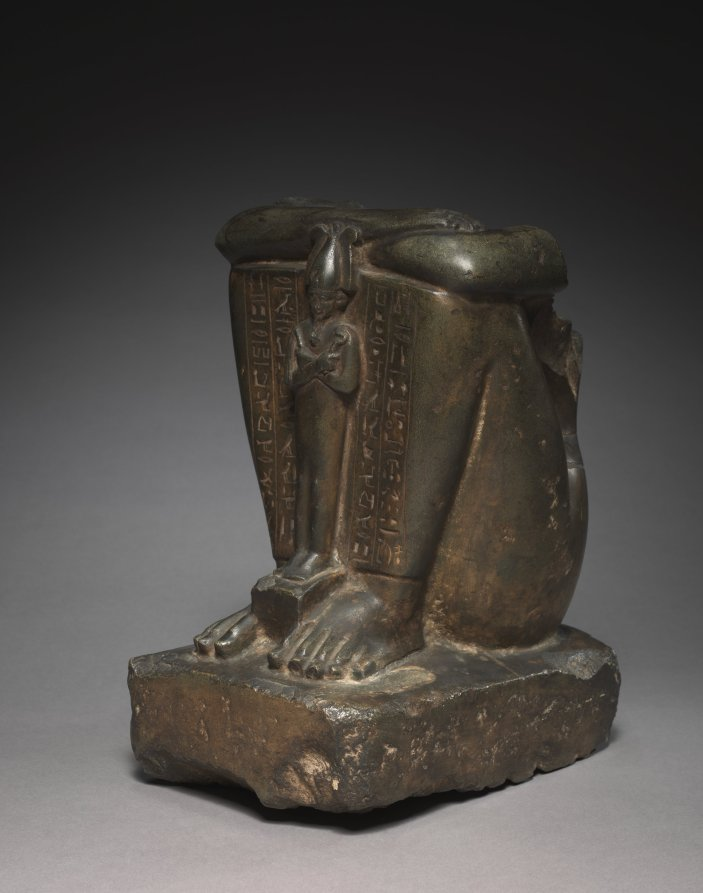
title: Block Statue of the Royal Acquaintance, Horwedja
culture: Egypt, Late period (715–332 BCE), Dynasty 26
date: 664–525 BCE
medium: graywacke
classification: Sculpture